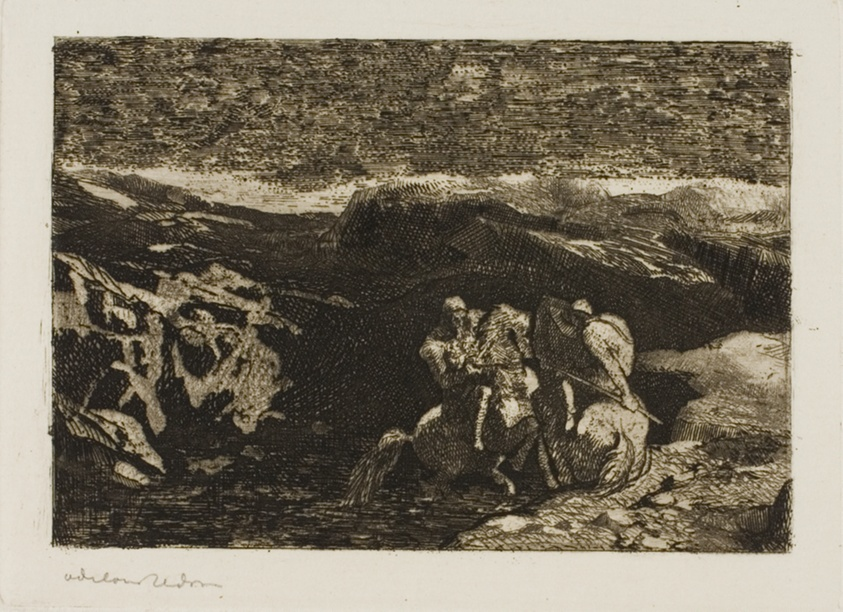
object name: Print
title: Horsemen in Combat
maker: Odilon Redon (French, 1840-1916)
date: 1865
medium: Etching and drypoint on ivory laid paper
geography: France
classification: etching; print; prints and drawing; paper